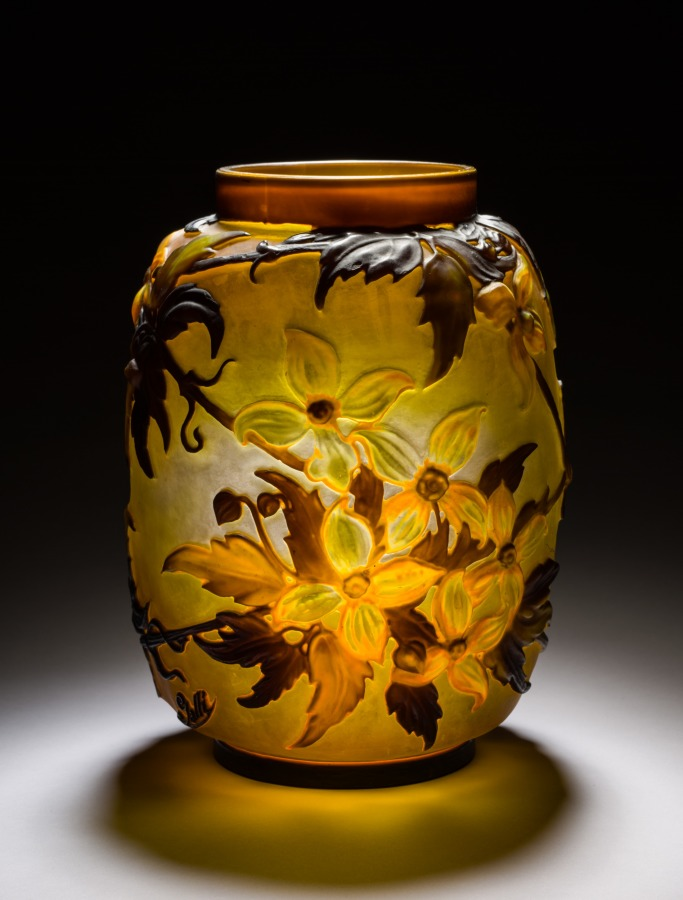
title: Vase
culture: France, 19th century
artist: Emile Gallé (French, 1846–1904)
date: c. 1920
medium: glass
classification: Glass